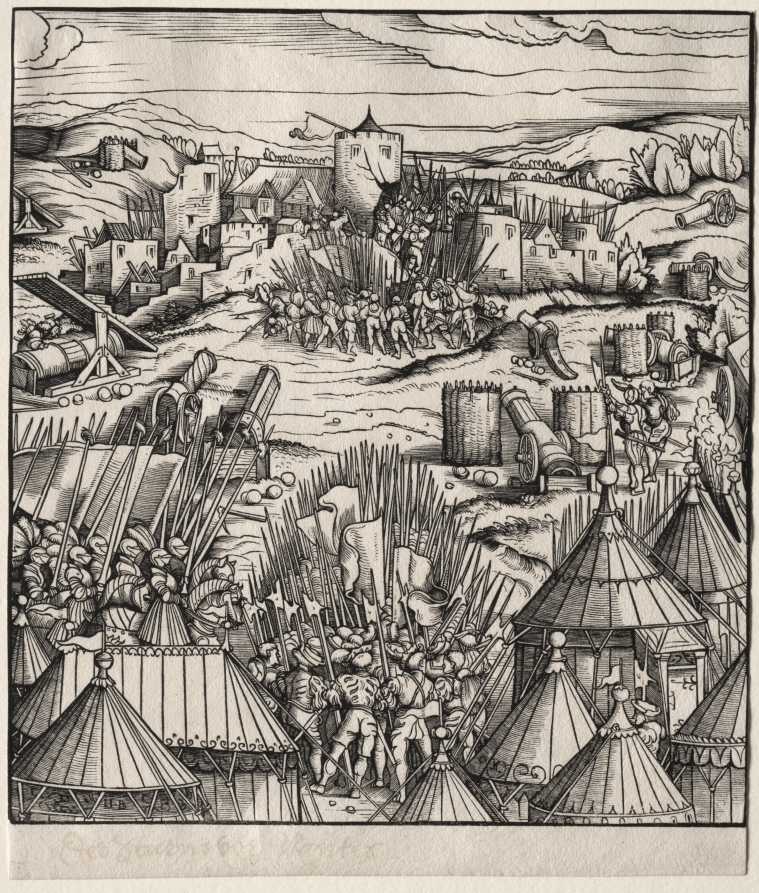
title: The Storming of Nantes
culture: Germany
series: Der Weisskunig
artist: Hans Burgkmair (German, 1473–1531)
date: 1512–15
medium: woodcut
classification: Print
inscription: lower left, in block: H·B ; lower left, in pen and brown ink[faded]: Der Sturm vor Nantes ; VERSO, lower left, in graphite: [illegible] ; lower left, in graphite: [...?] stark/[...?] ; lower center, in graphite: 05 ; lower right, in graphite: 6.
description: In this woodcut armored cavalry with lances approach from the left. The town itself is ringed by artillery, as attacking infantry rush through the breached fortifications. Note the use of halberds and pikes, close combat weapons in which the main fighting part is fitted to the end of a long shaft, typically of wood, which extends the user's range and striking power.